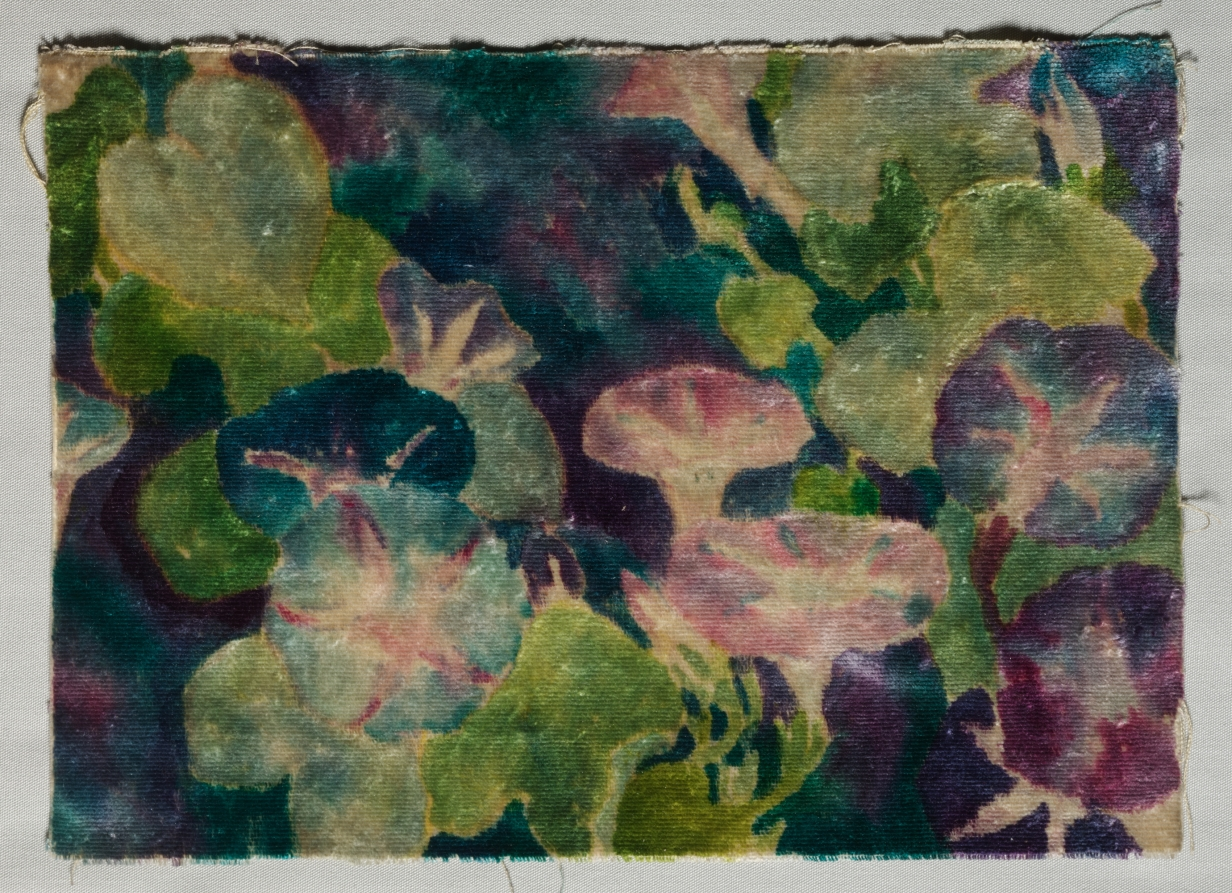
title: Stenciled Velvet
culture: America, New York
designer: Dorothy Marshall Hornblower (American, 1886–1968)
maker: Tiffany Studios (United States, New York, 1902–32)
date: c. 1902–10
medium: plain silk velvet stencilled with vegetable dyes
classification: Velvet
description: Textiles formed a large part of Louis Comfort Tiffany's artistic production, especially since he used many of them in his designs for artistic interiors. His clients included many society notables, institutions, churches, and even the White House. Tiffany employed many women artisans in his business, including Dorothy Marshall Hornblower, who oversaw the textile department and likely designed this ethereal Art Nouveau pattern.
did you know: This morning glory pattern stenciled velvet was likely used for drapery fabric.